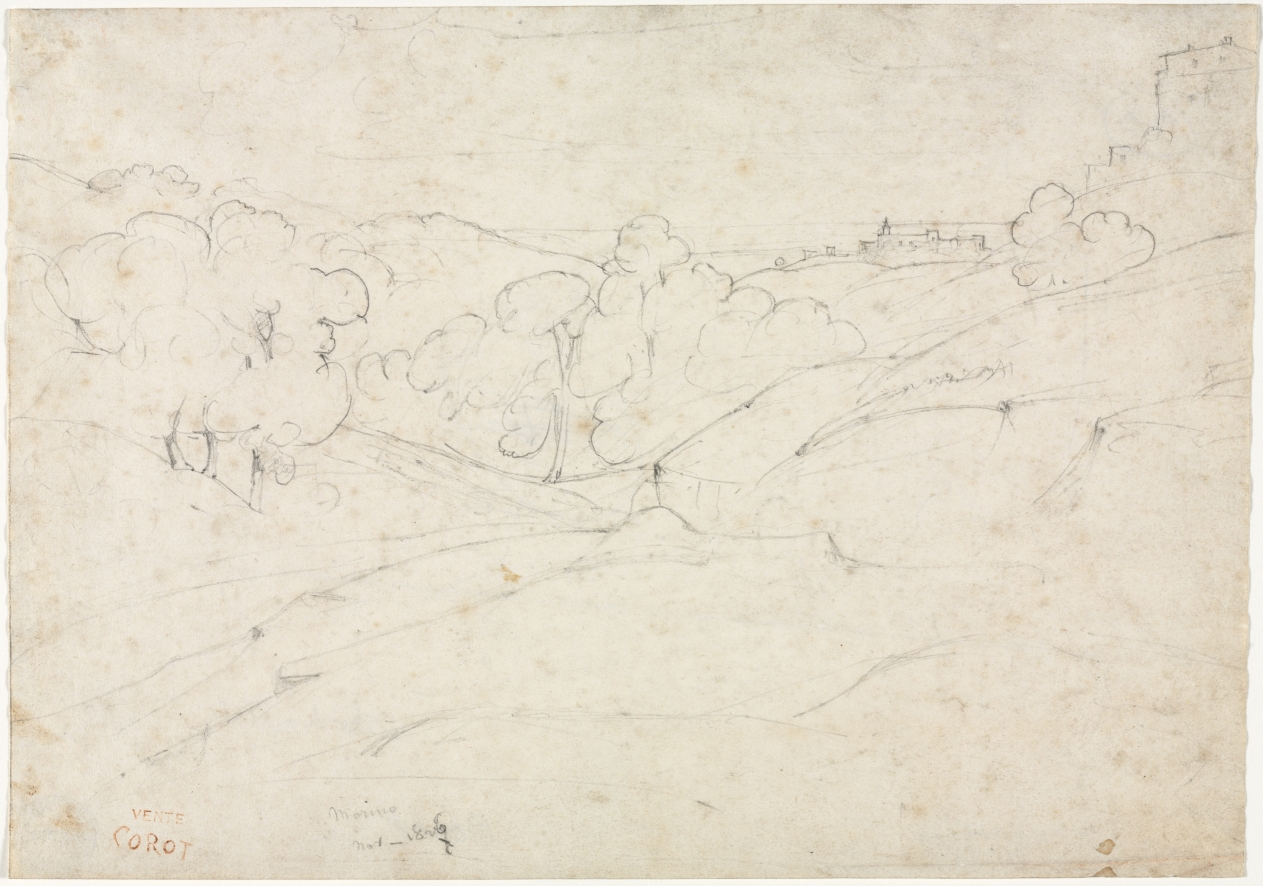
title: View of Marino (recto)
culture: France, 19th century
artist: Jean Baptiste Camille Corot (French, 1796–1875)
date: 1827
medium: graphite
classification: Drawing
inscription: [by artist?], lower left, in graphite: Marino / Nov - 1827 [in a later hand?: 6 written over the 7]